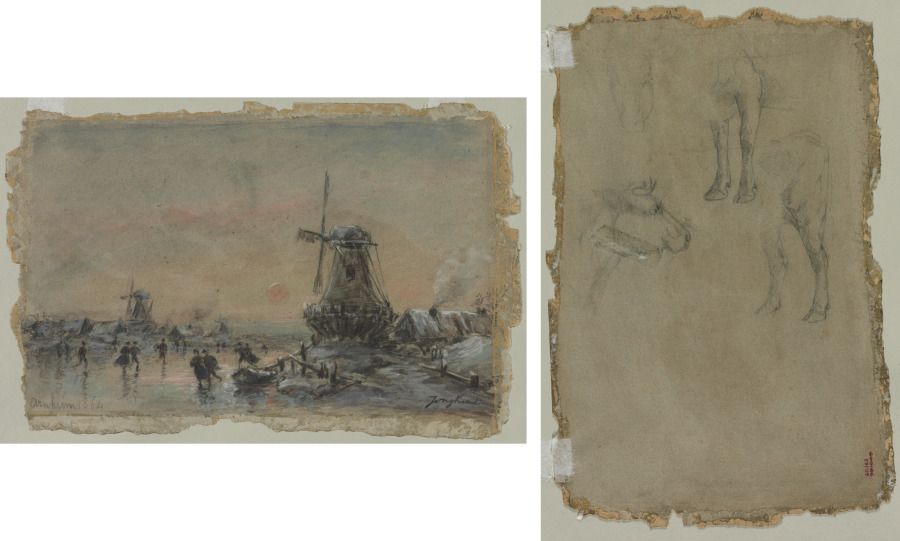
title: View of Arnheim (recto); Studies of a Bull (verso)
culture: Netherlands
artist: Johan Barthold Jongkind (Dutch, 1819–1891)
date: 1864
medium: black chalk, watercolor, and gouache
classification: Drawing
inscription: signed, lower right, in black gouache: Jongkind ; by artist, lower left, in graphite: Arnheim 1864